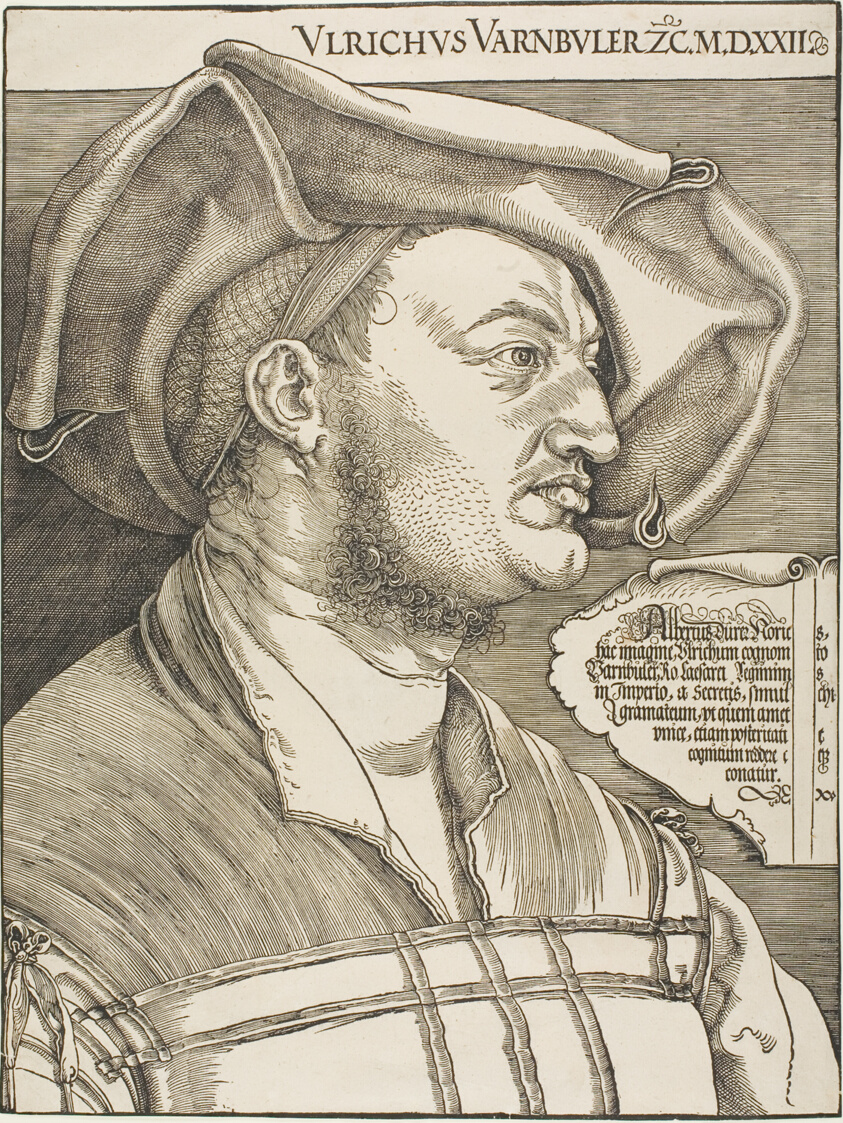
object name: Print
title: Portrait of Ulrich Varnbüler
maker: Albrecht Dürer (German, 1471-1528)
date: 1522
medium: Woodcut in black on ivory laid paper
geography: Germany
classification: woodcut; print; prints and drawing; paper